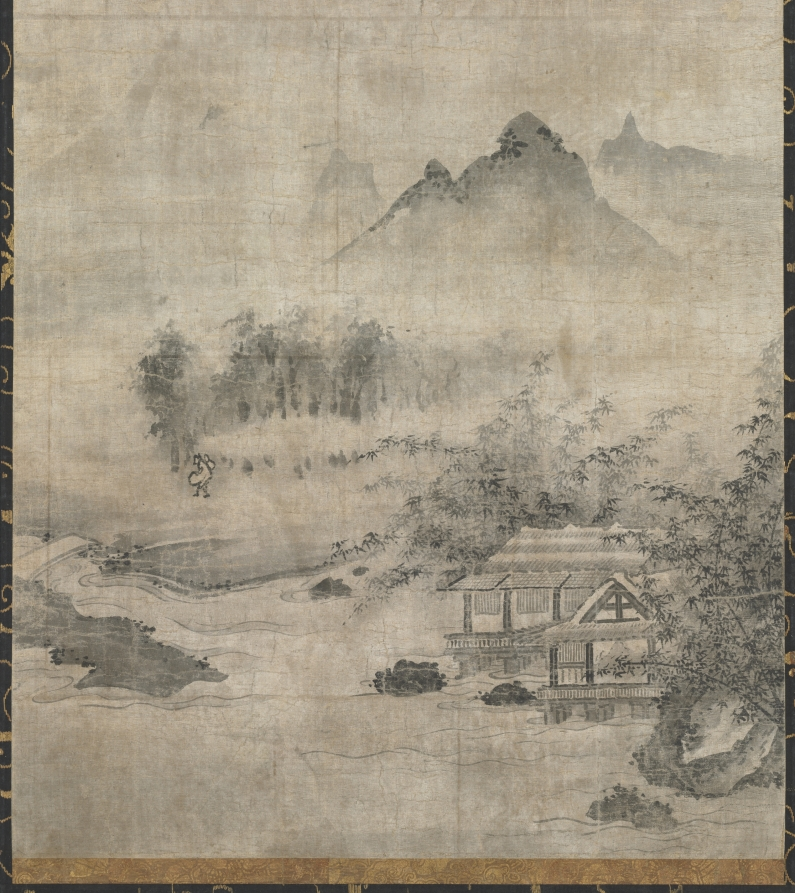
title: Landscape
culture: Japan, Edo period (1615–1868)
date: 1700s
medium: hanging scroll; ink and color on silk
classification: Painting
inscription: four inscriptions (one dated to 1414) by Japanese monks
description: This composition was fashioned after works created by Zen clerics of the Muromachi period (1392–1573), who often added their original Chinese-style poems above an ink painting to make a hanging scroll called a shigajiku. The poems here quote from essays on Sima Guang (1019–1086) by the Chinese Song dynasty literatus Su Shi (1037–1101). They interpret the studio surrounded with bamboo as a metaphor for the garden of Sima, the Song dynasty scholar-official who, in imitation of the Tang poet Bai Juyi, enjoyed the garden in isolation during his exile in Luoyang.